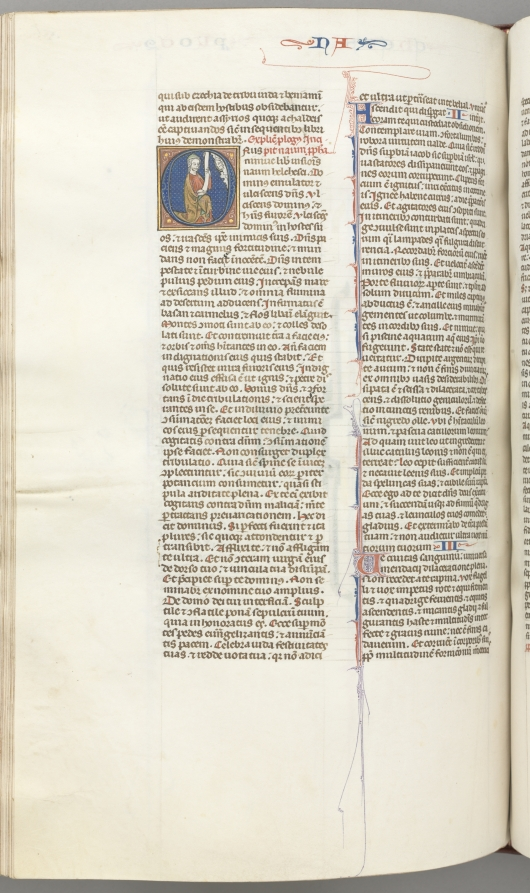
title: Fol. 360v, Nahum, historiated initial O, Nahum kneeling with a scroll, bust of God above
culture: Southern France, Toulouse(?), 13th century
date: c. 1275–1300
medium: ink, tempera and gold on vellum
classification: Bound Volume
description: Biblical manuscripts were highly prized and important possessions of churches, monasteries, cathedral schools, and universities throughout medieval Europe. The biblical texts were known as the vulgate, the translations made by Saint Jerome in the fourth century from Hebrew and Greek into Latin, which became the definitive and official Latin version of the Roman Church. In the 13th century, the bible was, for the first time, produced as a single volume with an officially sanctioned sequence to its books and chapters as illustrated by this example. The very extensive decoration of this bible is arranged hierarchically to indicate the relative importance of the various texts so that full or almost full-page initials mark the openings of the first prologue, Genesis, and the first Gospel; historiated initials mark the beginning of each book and illuminated initials mark the Prologues.